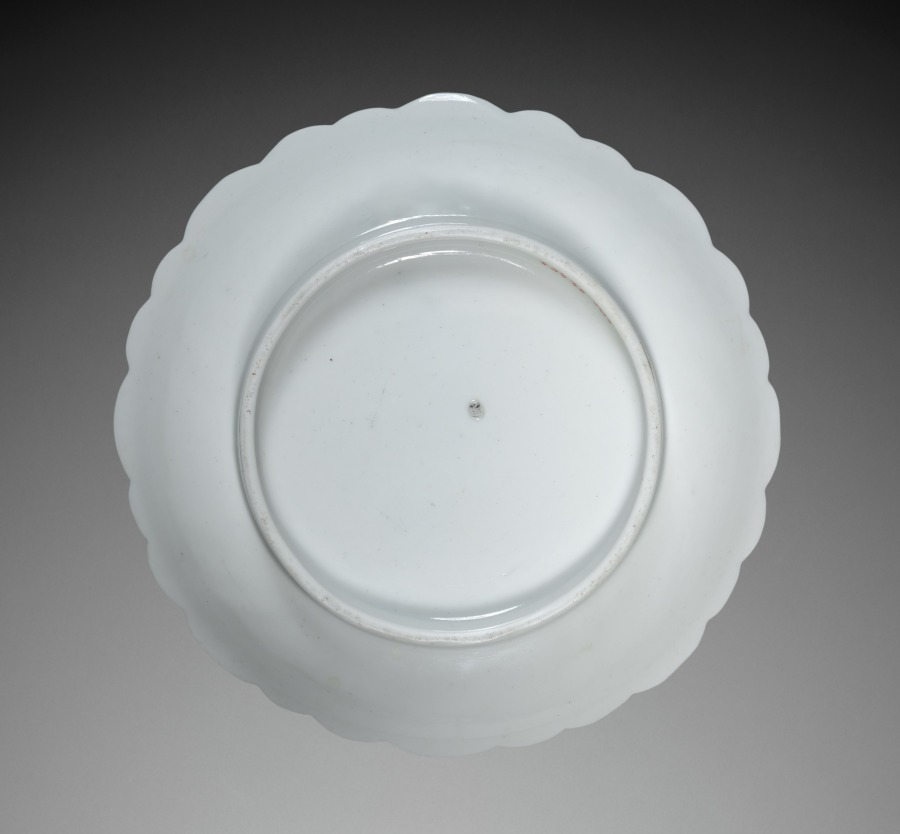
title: Small Dish with Flowers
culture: Japan, Edo period (1615–1868)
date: late 1600s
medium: porcelain with overglaze color enamel and molding (Hizen ware, Kakiemon type)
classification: Ceramic